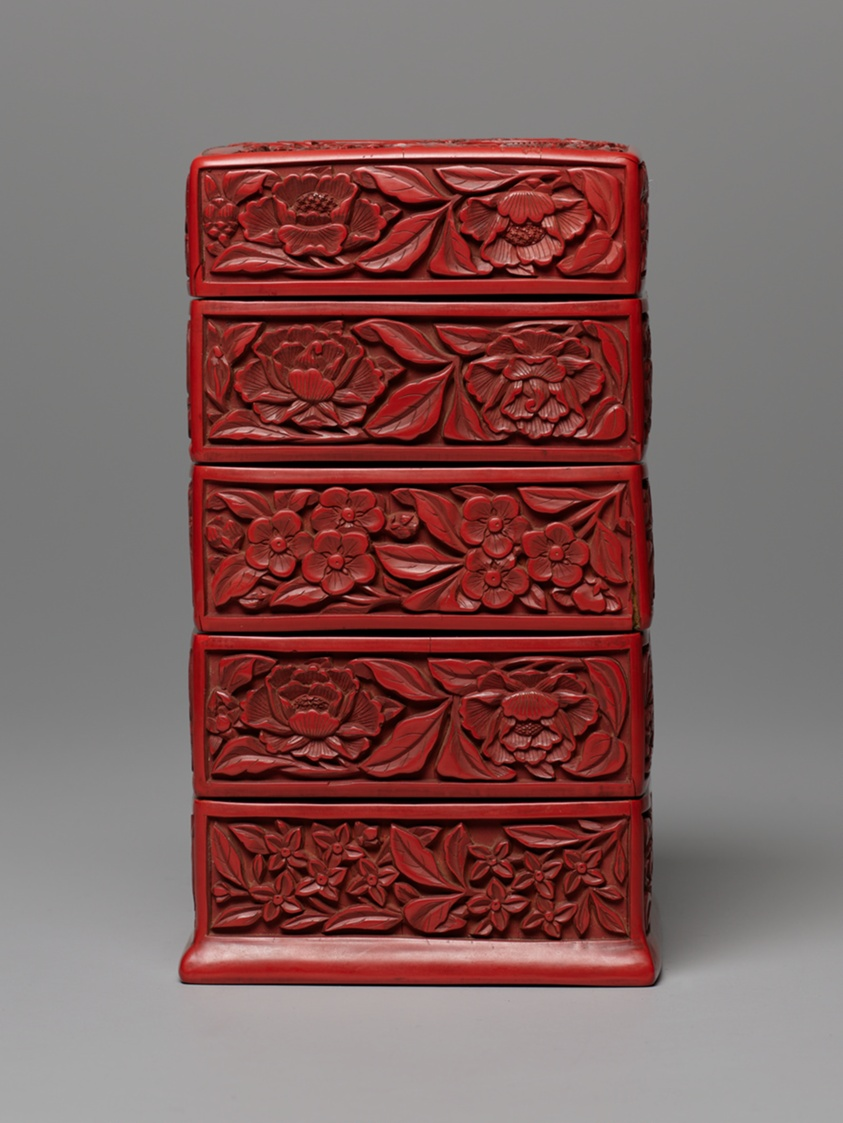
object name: Decorative Arts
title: Four-Tiered Square Box and Cover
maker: China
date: Ming dynasty (1368-1644), 16th century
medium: Carved cinnabar lacquer and black lacquer (interior)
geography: China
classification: lacquer